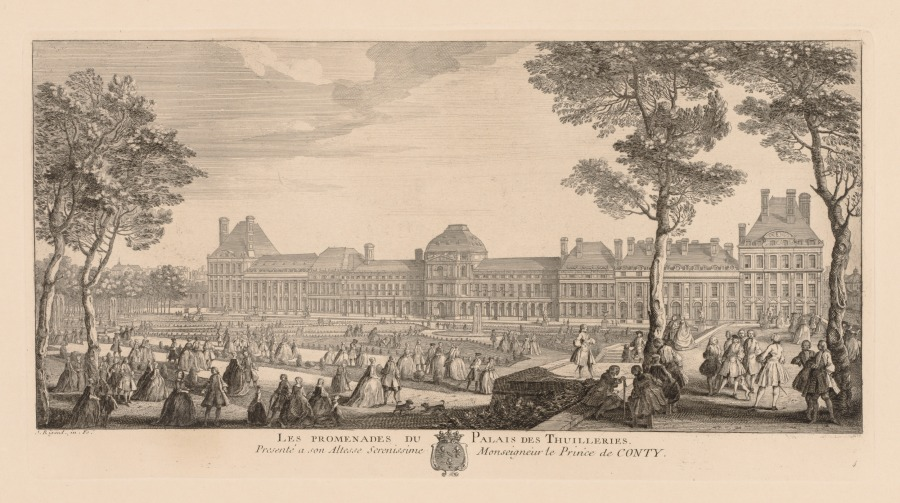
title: Promenades of the Palais des Tuileries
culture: France, 18th century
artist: Jacques Rigaud (French, 1681–1754)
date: c. 1720–29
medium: engraving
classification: Print